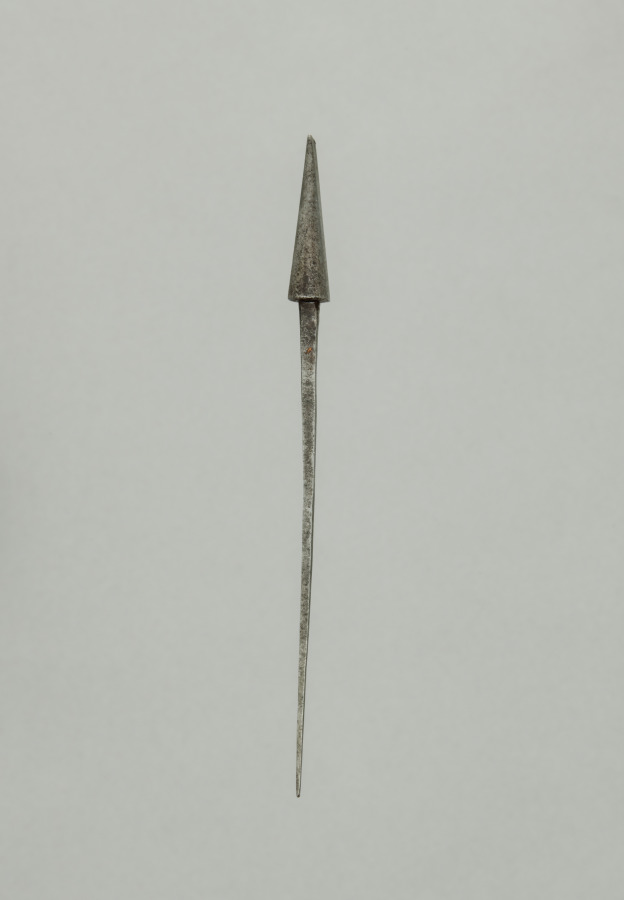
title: Arrow Point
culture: Japan, Edo period (1615–1868)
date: 1700s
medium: steel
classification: Arms and Armor